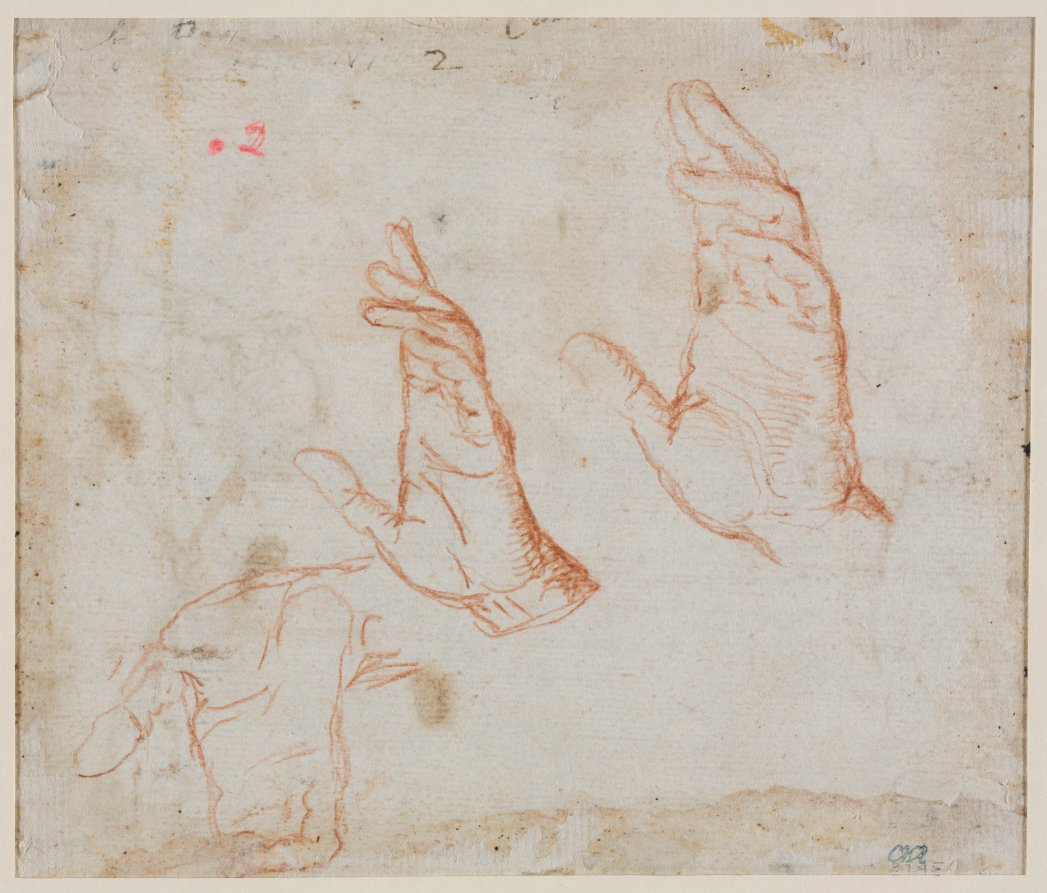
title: Study of Hands (verso)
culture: Italy, 16th century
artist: Camillo Procaccini (Italian, 1546–1629)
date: c. 1590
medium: red chalk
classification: Drawing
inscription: upper center, in brown ink: [illegible, cropped] / 2 ; upper left, in graphite: by Pr[illegible]Ni ; upper left, in pink pencil: .2 ; lower right, in graphite: [STAT?] ; SECONDARY SUPPORT, lower right, in graphite: 00265[2?] [cropped]